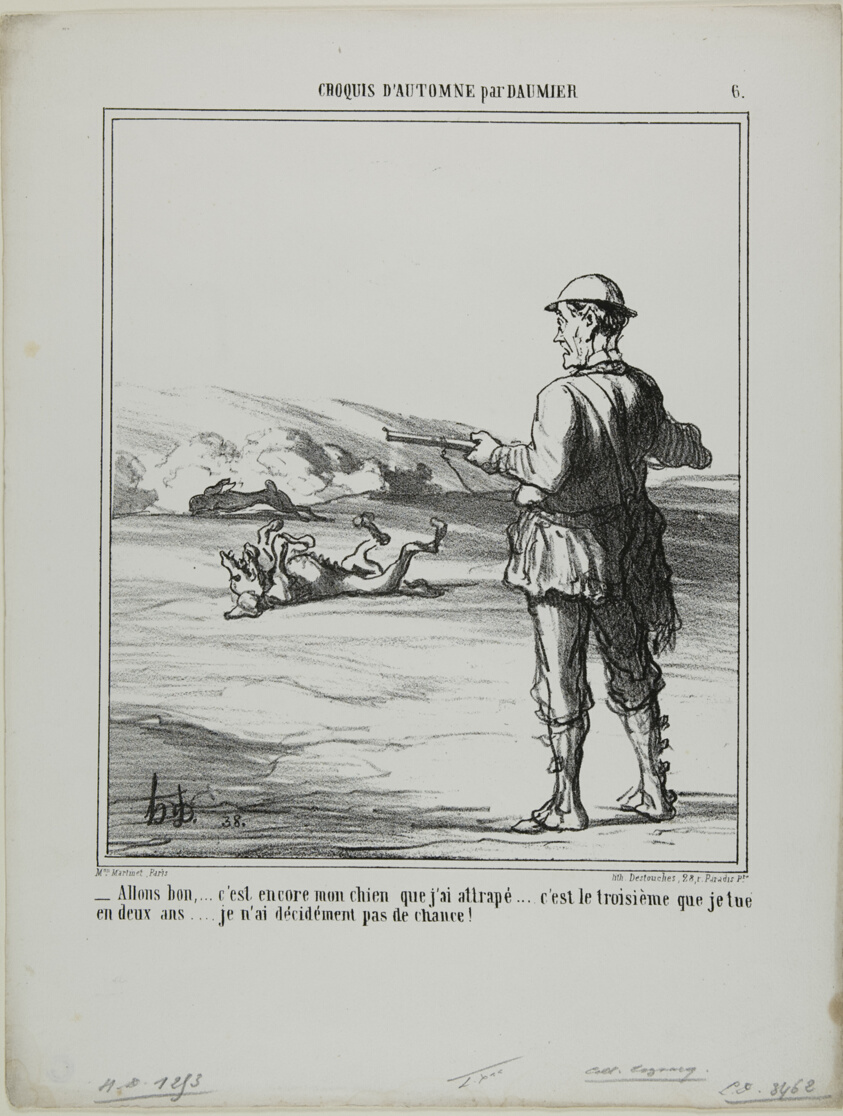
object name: Print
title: “- Oh blast! .... it's again my own dog that I shot..... that's the third one in two years.... I'm really not very lucky at hunting!,” plate 6 from Croquis D'automne par Daumier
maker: Honoré Victorin Daumier; French, 1808-1879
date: 1865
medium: Lithograph in black on white wove paper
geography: France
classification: lithograph; print; prints and drawing